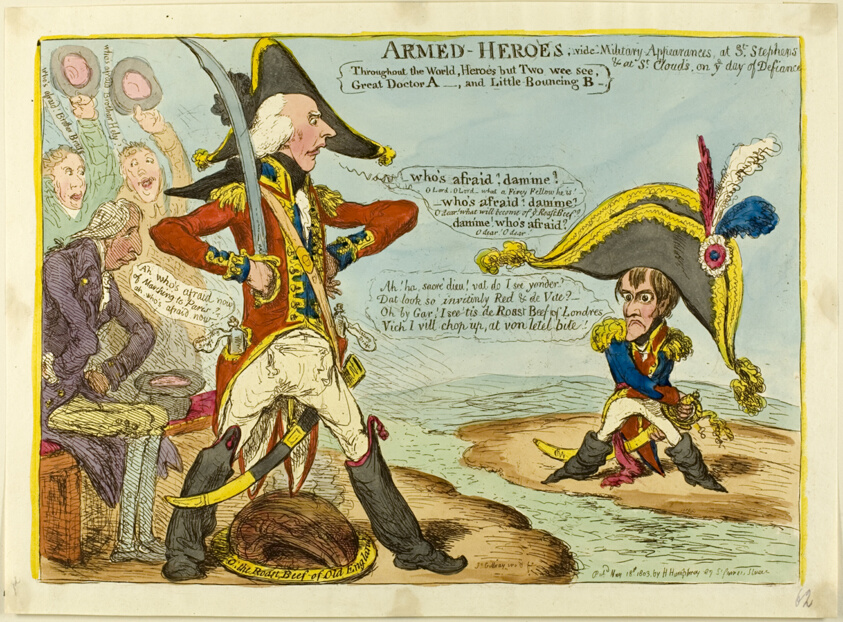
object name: Print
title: Armed Heroes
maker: James Gillray (British, 1756-1815); published by Hannah Humphrey (English, c. 1745-1818)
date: 1803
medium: Etching, with hand-coloring, on paper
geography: England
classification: etching; print; prints and drawing